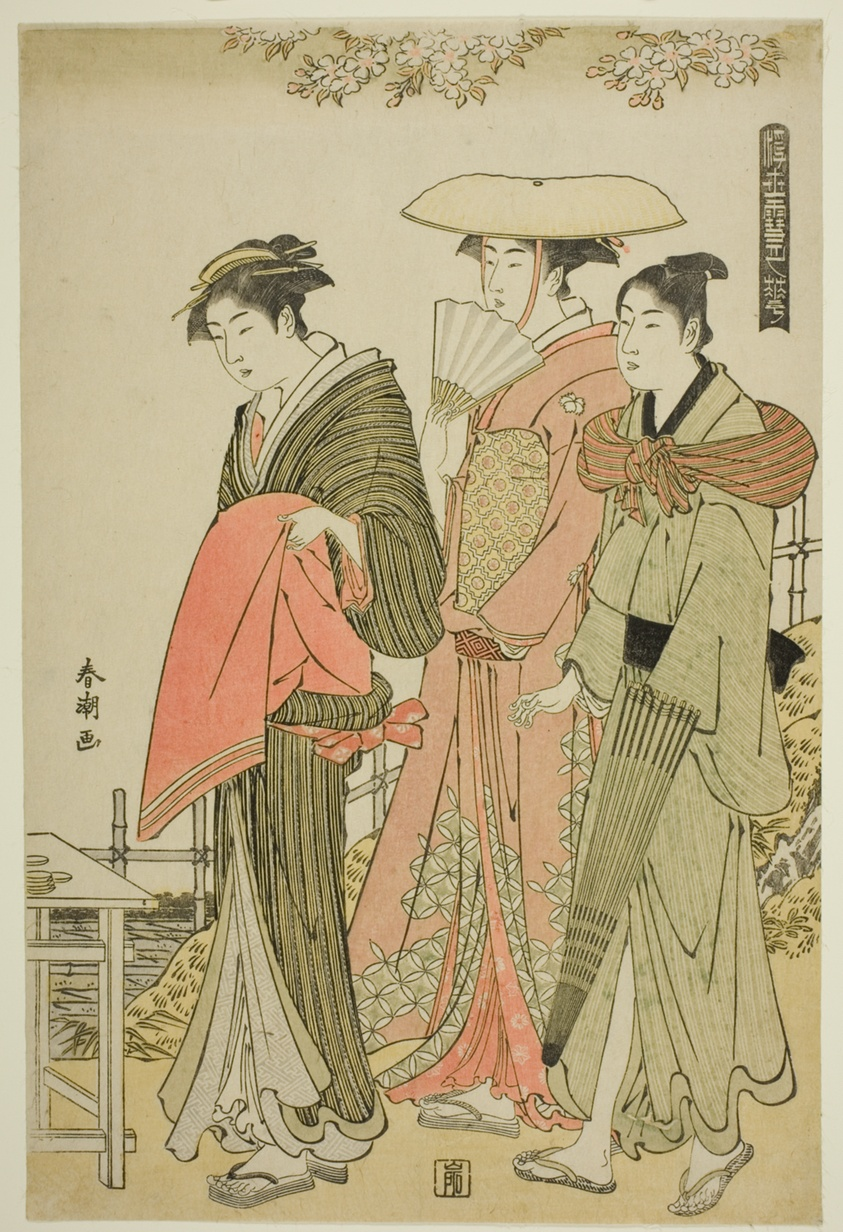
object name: Print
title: Flowers, from the series "Snow, Moon, and Flowers of the Floating World (Ukiyo setsugekka)"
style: Japanese (culture or style)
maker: Katsukawa Shuncho; Japanese, active c. 1780-1801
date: c. 1784/85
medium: Color woodblock print; oban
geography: Japan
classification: woodblock print; print; asian art